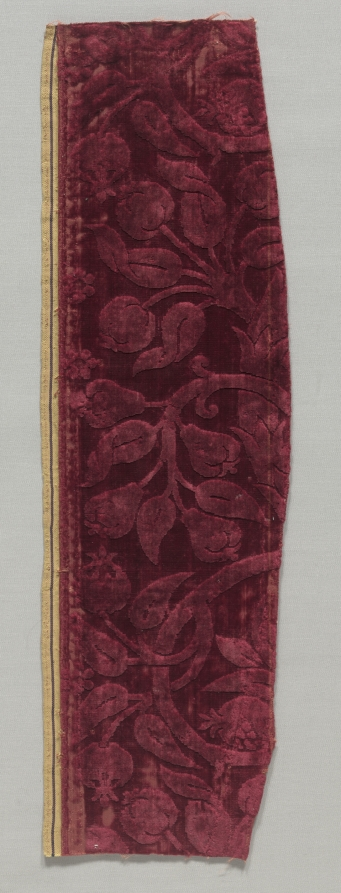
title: Fragment with Floral Pattern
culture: Spain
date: 1600s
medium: velvet with two levels of cut pile; silk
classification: Velvet